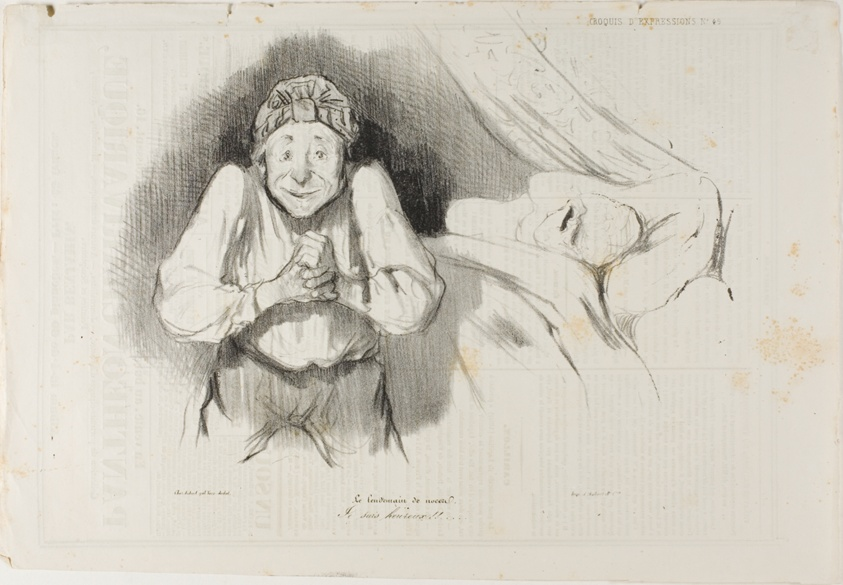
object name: Print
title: Abuse of article 214 of the civil law. “My lady wife, you let me want for everything, you only allow me a miserable pension of three thousand francs, you throw me out of your door like a beggar, and, what is more, you want to drive me away from Paris, exile me, deport me!... No! No! I won't leave France! I won't! I won't!!... Listen, I owe my friend Bertrand 10'000 Fr., it's a gambler's debt, a debt of honor, I owe my cook 525 Fr. and ten francs for my chambers, a total of 10'535 Fr. Let me have a few thousand francs more to take my mind off my domestic worries and, on my word of honor, I won't pester you any longer,” plate 50 from Caricaturana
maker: Honoré Victorin Daumier; French, 1808-1879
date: 1839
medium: Lithograph on ivory wove paper, with letterpress verso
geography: France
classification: lithograph; print; prints and drawing